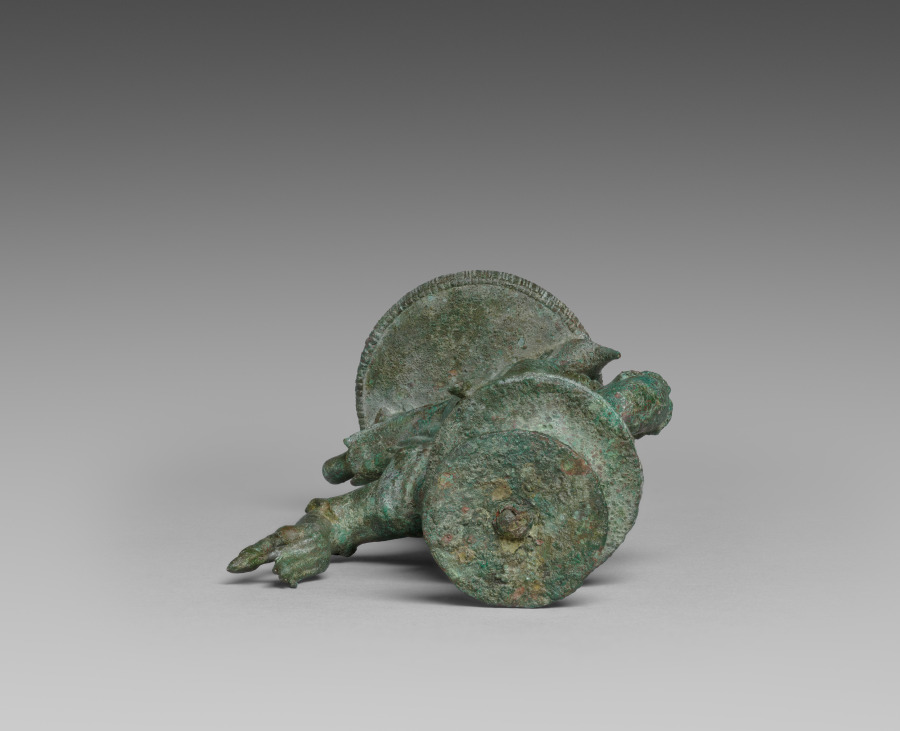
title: Candelabrum Stand of a Dancing Maenad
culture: Etruscan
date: 525–500 BCE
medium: bronze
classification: Sculpture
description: Conceived primarily in two dimensions—front and rear silhouette—this small bronze dancer probably once belonged to an elaborate candelabra or incense burner. The exaggeratedly long fingers and pointed shoes characterize the work as Etruscan, as do the stylized folds of the figure’s dress, which add visual interest but not verisimilitude. While her right hand holds above her head a cylindrical support, her left squeezes a small object, perhaps a fruit or clapper.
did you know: A small turtle beneath the figure’s back foot suggests a rustic setting.